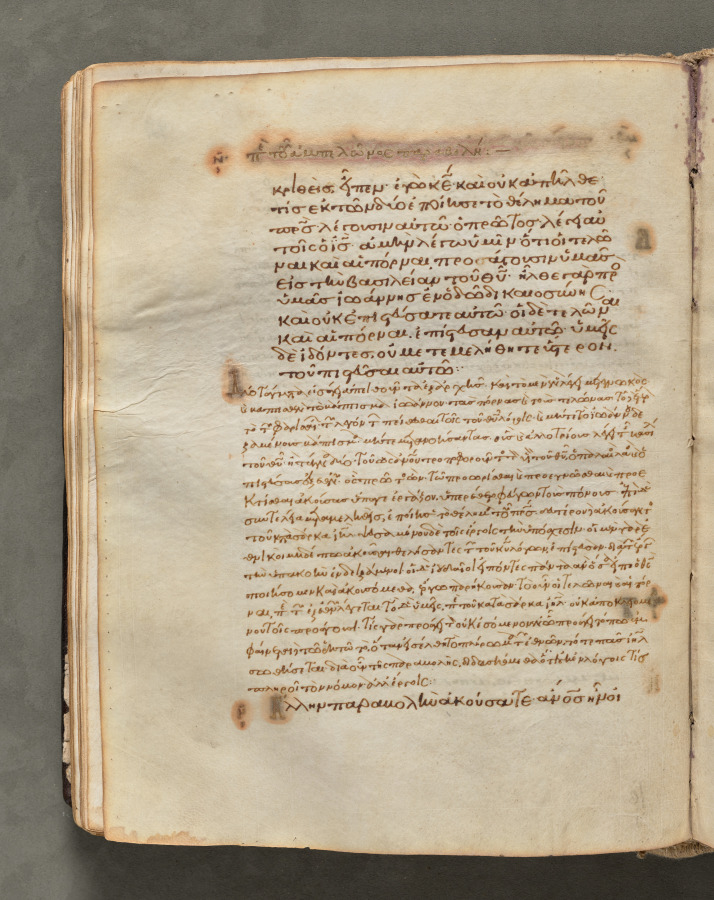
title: Text, folio 94 (verso), from a Gospel Book with Commentaries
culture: Byzantium, Constantinople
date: c. 1000–1100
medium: ink, tempera, and gold on vellum; leather binding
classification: Bound Volume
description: Each of the four gospels in this book opens on a page with brilliantly illuminated borders depicting the author of the text as well as birds-principally peacocks, symbols of the immortality of the soul-and fountains, representing the fountain of life and the salvation of the soul. This volume consists of 428 leaves with texts in Greek. Its level of sophistication suggests that it was probably written and decorated in a monastery in Constantinople.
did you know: Gospel Books were carried in procession through Byzantine churches.